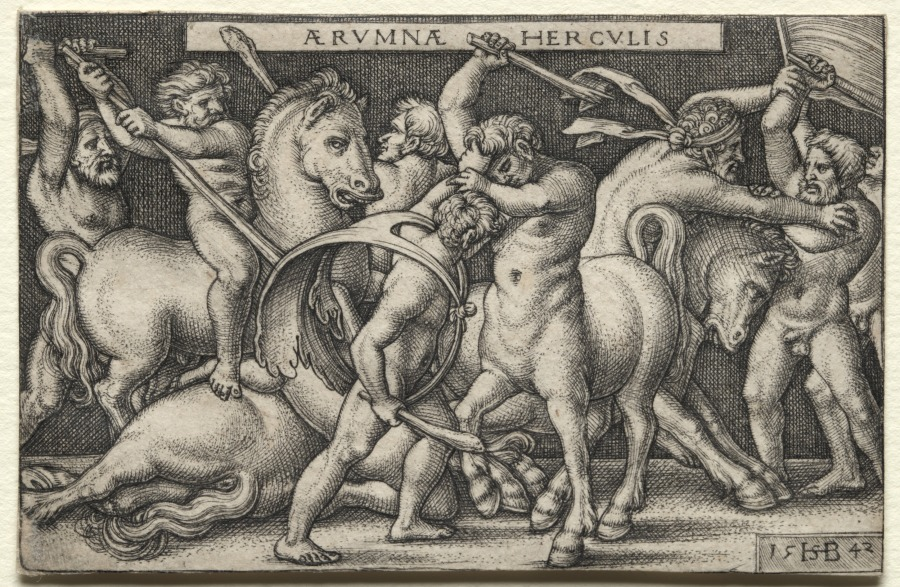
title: The Labors of Hercules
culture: Germany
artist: Hans Sebald Beham (German, 1500–1550)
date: 1542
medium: engraving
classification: Print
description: Beham was one of several German printmakers referred to today as the “Little Masters.” They established their artistic prowess by engraving remarkably small prints, appealing to collectors fascinated with miniature objects and curiosities. Here, Beham has packed 12 larger-than-life stories of the mighty Hercules into tiny prints. The series includes three of the 12 labors Hercules performed as penance for slaying his children in a fit of madness: Strangling the Nemean Lion, Killing the Lernean Hydra, and Dragging Cerberus from the Underworld. The other scenes depict tales from his life and the events preceding his death. The son of Jupiter and the mortal Alcmena, Hercules was both man and god. His saga of moral and physical trials made him one of the most popular classical heroes in Renaissance art.